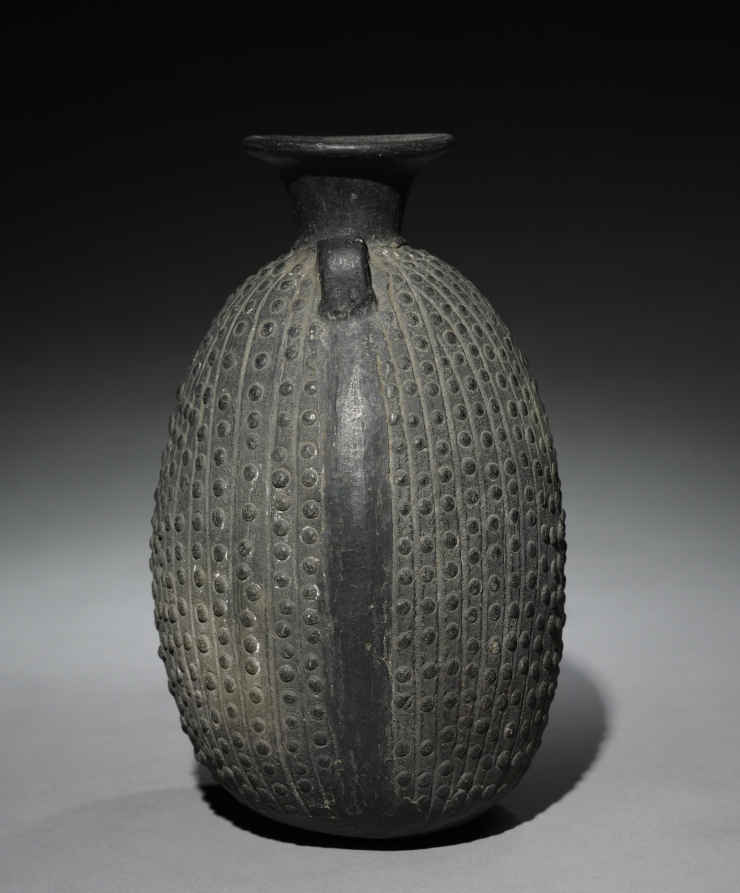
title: Darkware Vessel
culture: Peru, North Coast, Chimú style (900-1470)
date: late 1400s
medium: black ware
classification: Ceramic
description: Under the Chimú, whose empire stretched for 800 miles along the Peruvian north coast, the value of ceramics fell, perhaps because high-status vessels were made of precious metals. Accordingly, ceramics were mass-produced with molds and, rather than bearing painted scenes, often have an overall dark surface achieved by firing in a smoky atmosphere. This firing method was also used for very early Andean ceramics, including the example at the far left. We don't know whether the Chimú revived the method to venerate earlier cultures. The vessel with the stripped surface was made after the Chimú were conquered by the Inka in the late 1400s.